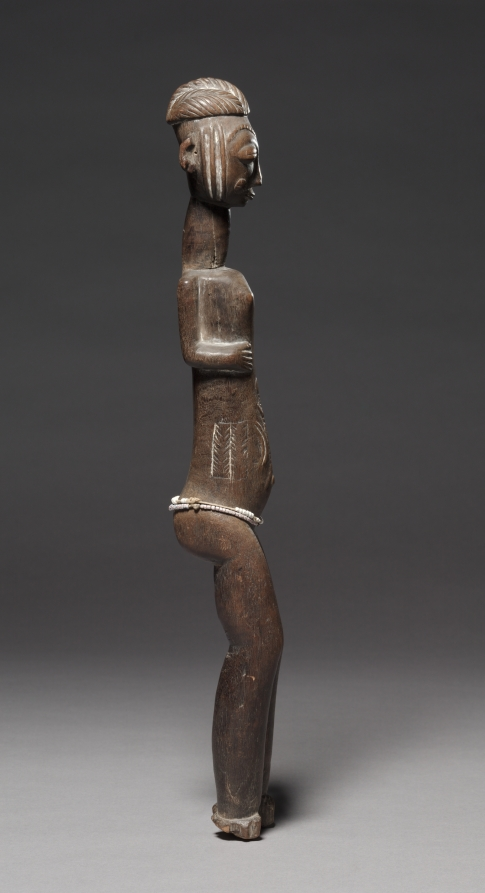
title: Female Figure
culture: Africa, West Africa, Côte d'Ivoire, possibly Bondoukou region, unknown maker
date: late 1800s–early 1900s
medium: Wood, paint, glass beads, and natural fiber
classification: Sculpture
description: An artistic melting pot, the Bondoukou region in northeastern Côte d’Ivoire near the border with Ghana is inhabited by several ethnic groups whose cultures and artistic styles often intermingle. This figure’s rounded shapes and delicate surface decoration––which seem to imitate body scarifications––closely resemble the style of Baule carvings. The figure’s meaning and function remain a mystery.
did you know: Artworks from different regions traveled across Africa; while found in Wenchi, Ghana, this figure was made in nearby Côte d'Ivoire.